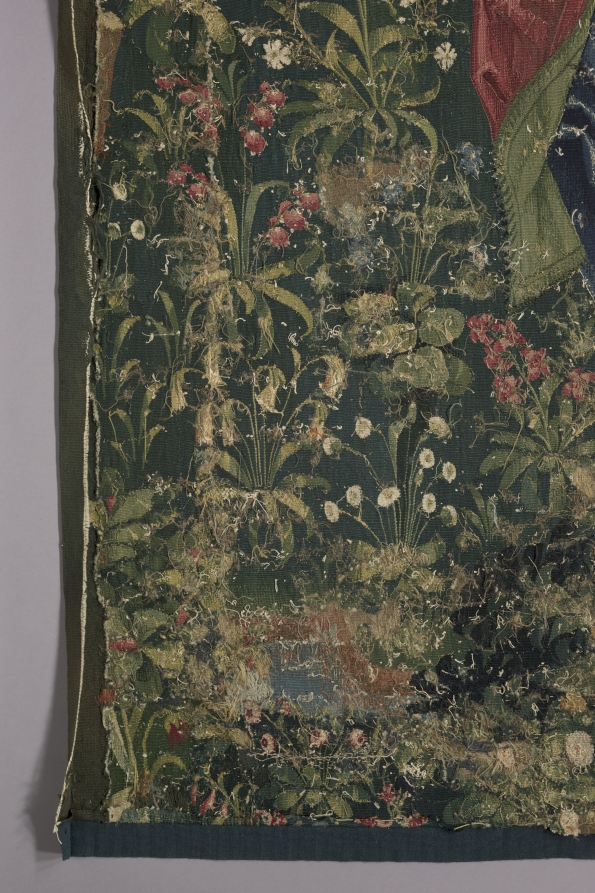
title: The Triumph of Eternity (from Chateau de Chaumont set)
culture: France, Lyon(?), early 16th century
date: 1512–15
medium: silk and wool; tapestry weave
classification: Tapestry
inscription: French verse in Gothic letters translates as follows: "Nothing triumphs by right authority, Unless it be conducted by Eternity. Nothing is permanent beneath the firmament, But above us triumphs Eternity."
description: The Triumph of Eternity is represented by the Coronation of the Virgin. Dressed in crimson velvet with an opulent brocaded velvet shawl, the Virgin is seated in the center as two angels hold a crown over her head. Five musical angels surround her playing an organ, recorder, straight cornetto, harp, and lute, while another sings from an open music book. The scenes in the set display a conservative style in which the figures are placed in shallow landscapes, thereby ignoring pictorial innovations for depicting space and mass. The verse in Old French at the top states: Nothing triumphing by due authority Remains permanent and durable. Nothing is permanent under the heavens, But above, eternity triumphs.